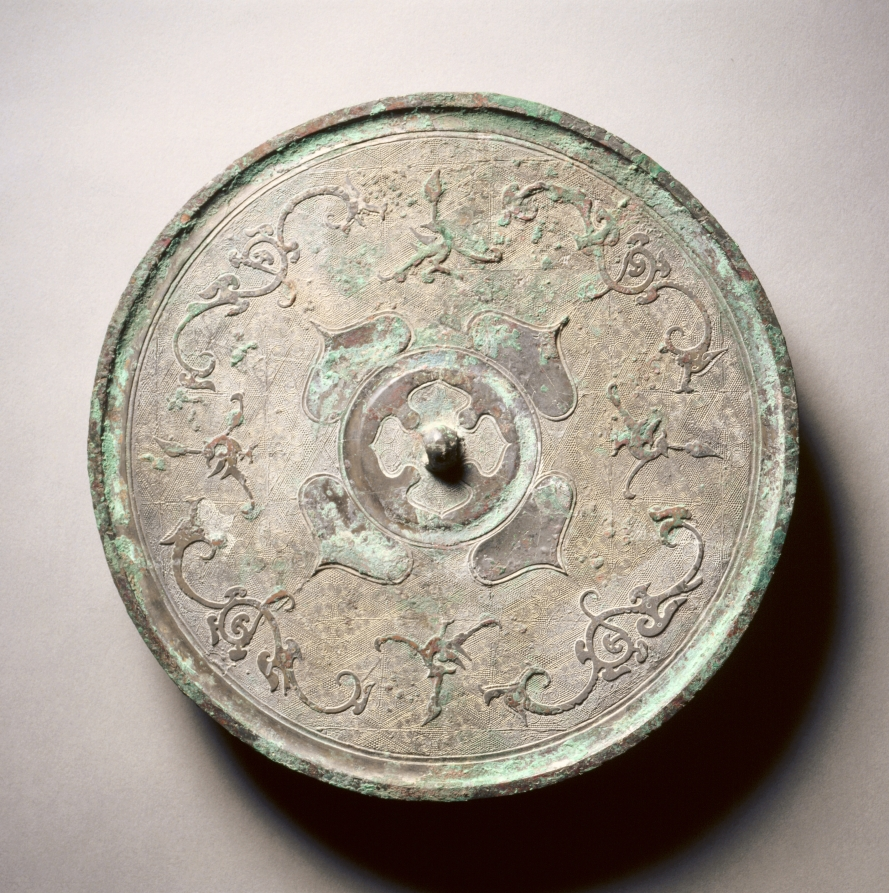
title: Mirror with Double Quatrefoils, Dragons, and Phoenixes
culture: China, Eastern Zhou dynasty (770–256 BCE), Warring States period (475–221 BCE)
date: 200s BCE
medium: bronze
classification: Metalwork